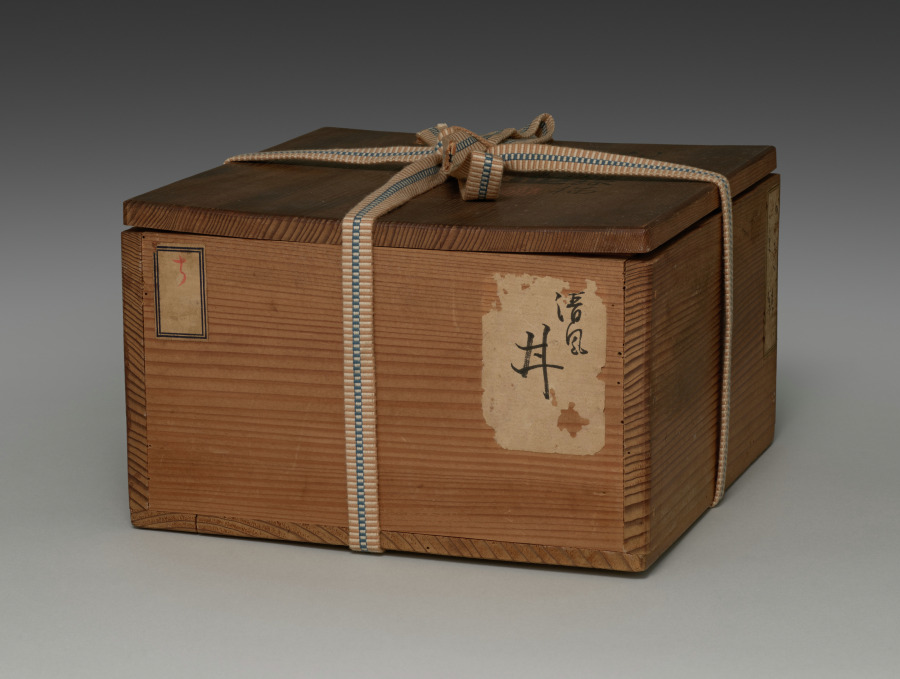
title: Bowl with Numinous Fungi and Kirin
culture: Japan, Meiji period (1868–1912)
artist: Seifū Yohei III (Japanese, 1851–1914)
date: 1893–1900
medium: Porcelain with cobalt blue glaze, overglaze color enamel, and silver painting overlay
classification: Ceramic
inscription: 清風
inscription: 清風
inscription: 帝室技芸員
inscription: 清風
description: The complex design of this bowl is also technically sophisticated in its execution. On the interior, Yohei III has placed a mythical beast called a kirin (Chinese, qilin) within a double-banded circle painted in cobalt blue under the glaze. Around the interior of the mouth, bordered at top and bottom with underglaze blue under a brown iron oxide painted rim, he has painted a continuous coin pattern with a red wash and green color enamels. The pattern is further defined and embellished with black iron outlining the green- and gold-painted diamonds over the diluted red. The inside is otherwise left white. On the exterior, the body has a dark blue glaze and an overlaid silver design of reishi with incised lines for detail.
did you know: Inside the bowl is an auspicious, mythical deerlike creature called kirin in Japanese (麒麟 or qilin in Chinese).